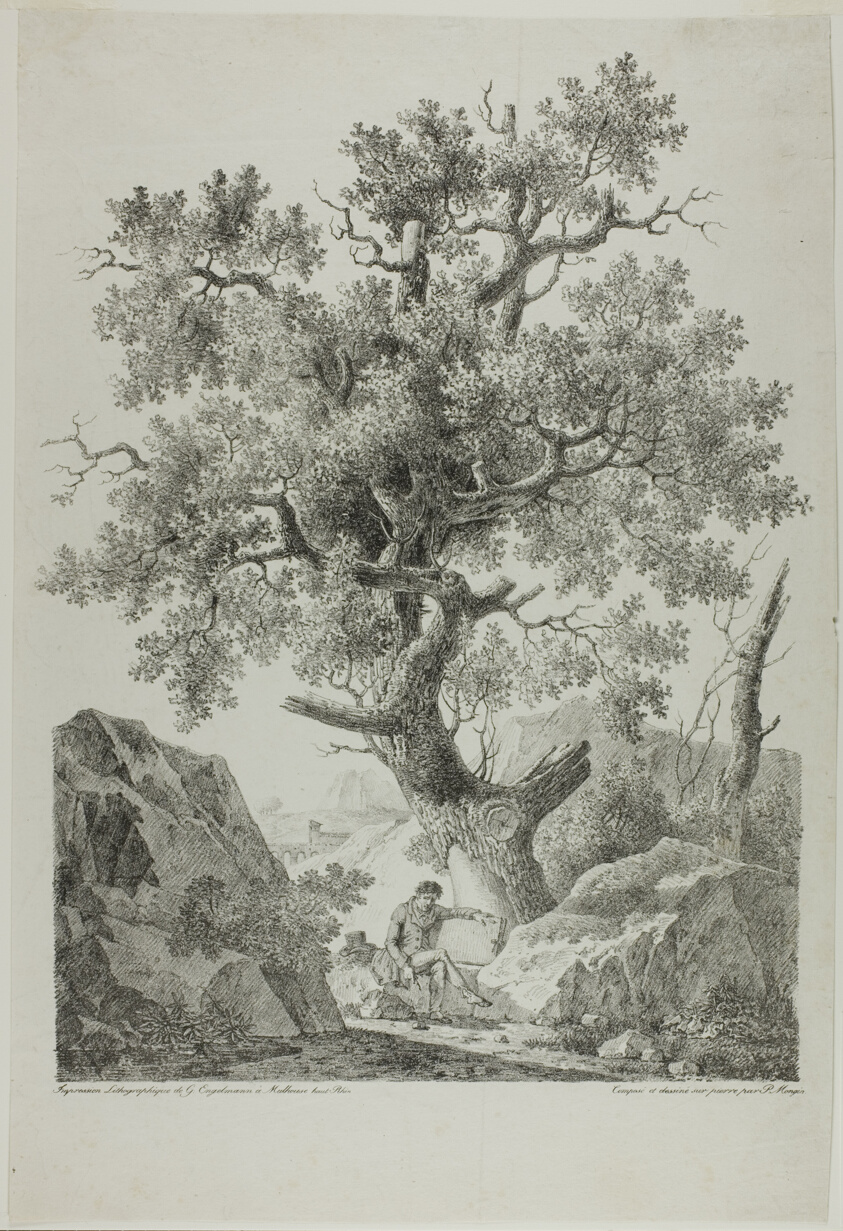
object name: Print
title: Artist in a Rocky Landscape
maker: Pierre-Antoine Mongin (French, 1761-1827); printed by Gottfried Engelmann (French, 1788-1839)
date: 1816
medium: Lithograph in black on ivory wove paper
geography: France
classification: lithograph; print; prints and drawing